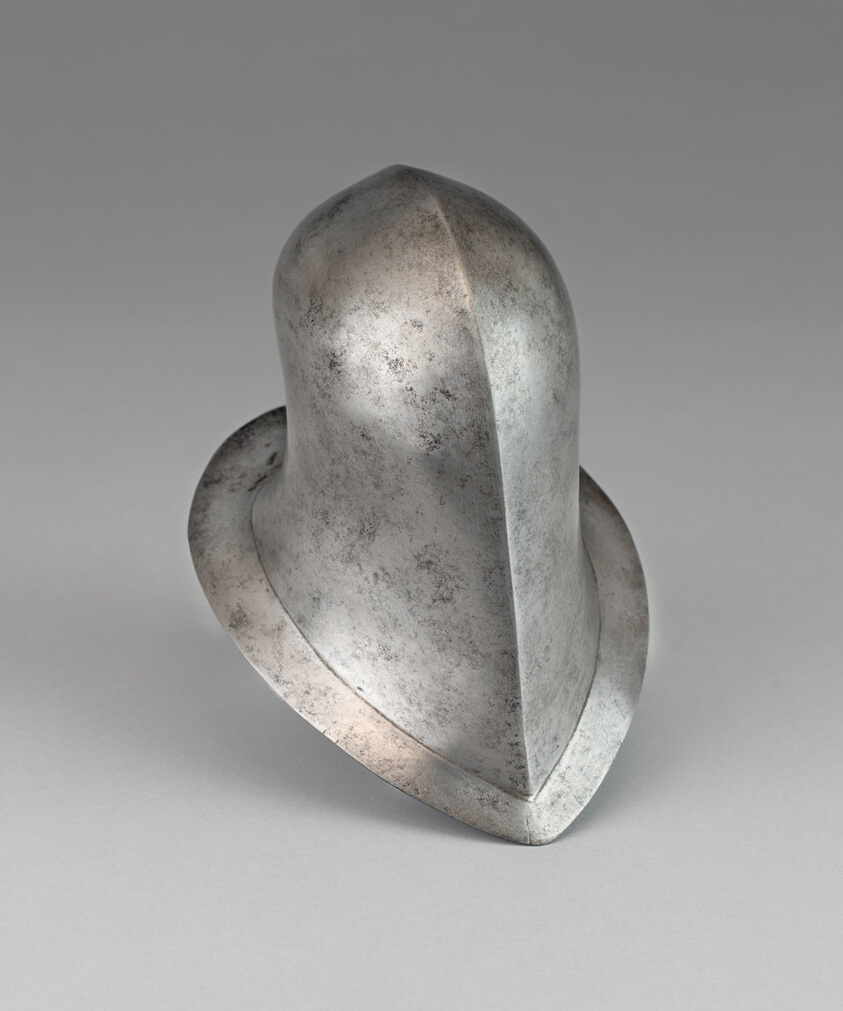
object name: Armor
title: Codpiece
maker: German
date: 1550/70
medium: Steel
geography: Germany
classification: suit-element; armor; arms and armor